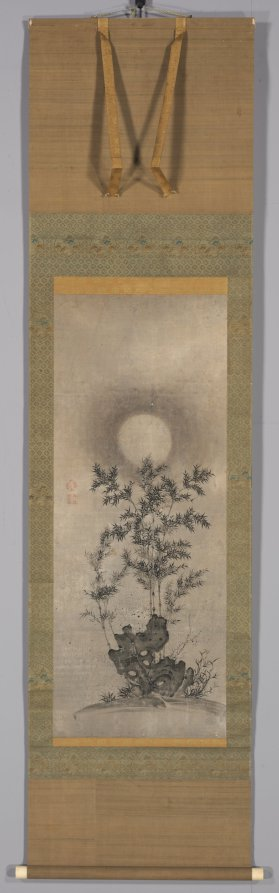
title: Bamboo in Moonlight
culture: Korea, Joseon dynasty (1392–1910)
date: 1500s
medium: hanging scroll; ink on paper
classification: Painting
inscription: two seals of artist (?) at upper left side.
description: This painting depicts the full moon shining through a stand of bamboo, and for Joseon literati it would have conveyed the sense of life in harmony with nature to which they aspired. As one of the "four gentlemen" along with plum trees, orchids, and chrysanthemums, bamboo, which has immense flexibility, allowing it bent to extremes without breaking—symbolize a gentleman's noble virtue. Here, the painter depicted the shining moon rising above a bamboo tree to create a meditative nightly scene.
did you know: This painting is currently in the Korean art collection, but some stylistic features suggest that it may be Japanese.